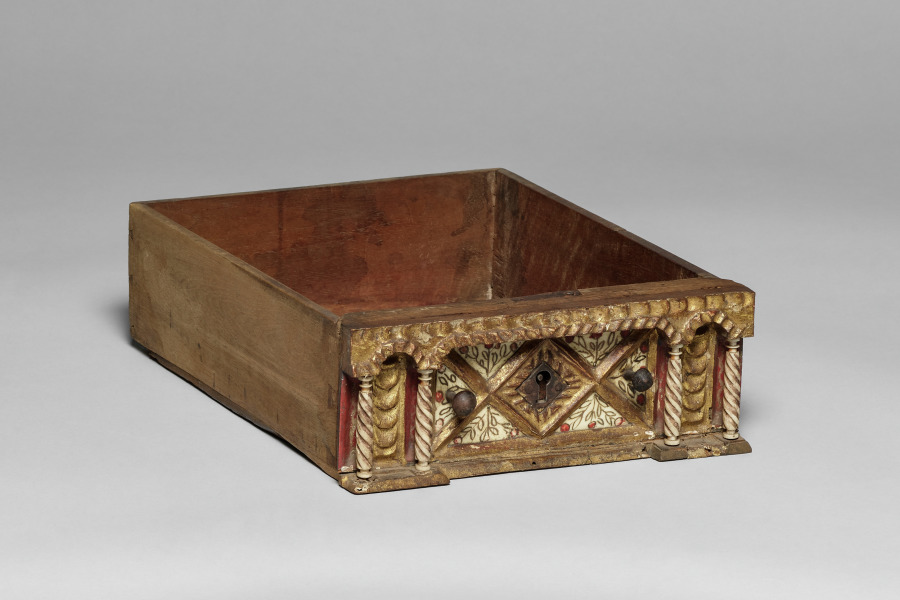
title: Chest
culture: Spain, Colonial, late 17th Century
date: late 1600s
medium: turned and joined wood, gilded and painted red with applied bone columns and bone inlays, wrought iron hardward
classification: Furniture and woodwork